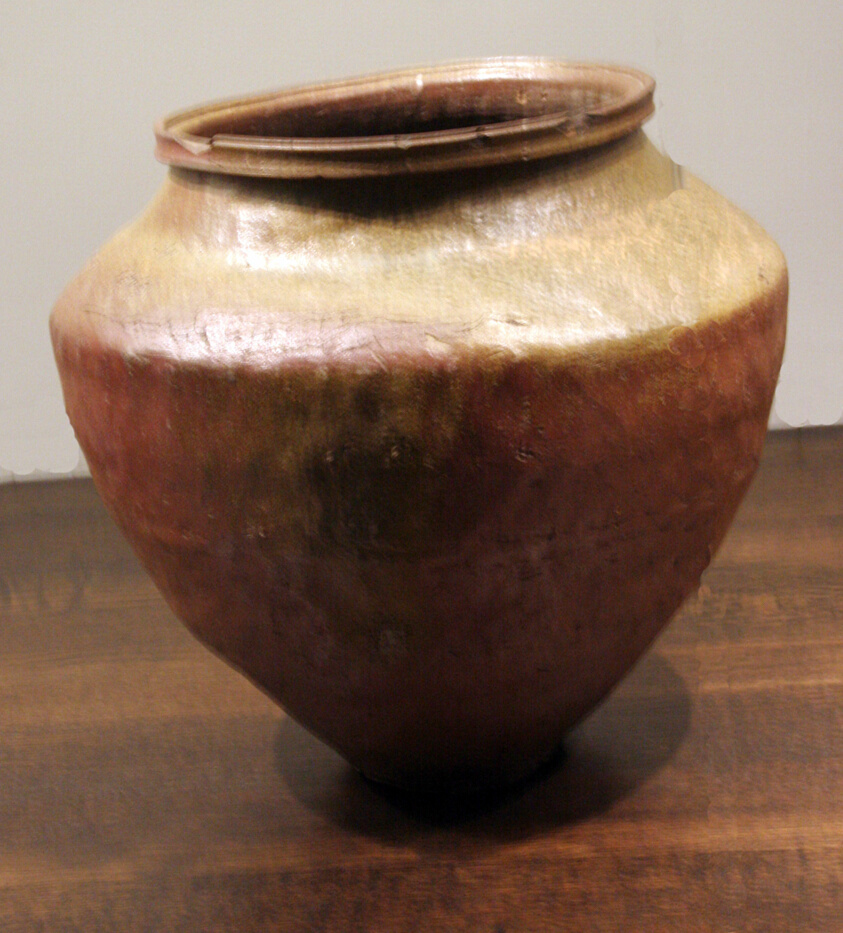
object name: Vessel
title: Tokoname-Ware Jar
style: Japanese (culture or style)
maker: Japan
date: 14th century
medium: Stoneware with ash glaze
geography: Japan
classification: stoneware; ceramics; asian art; vessel